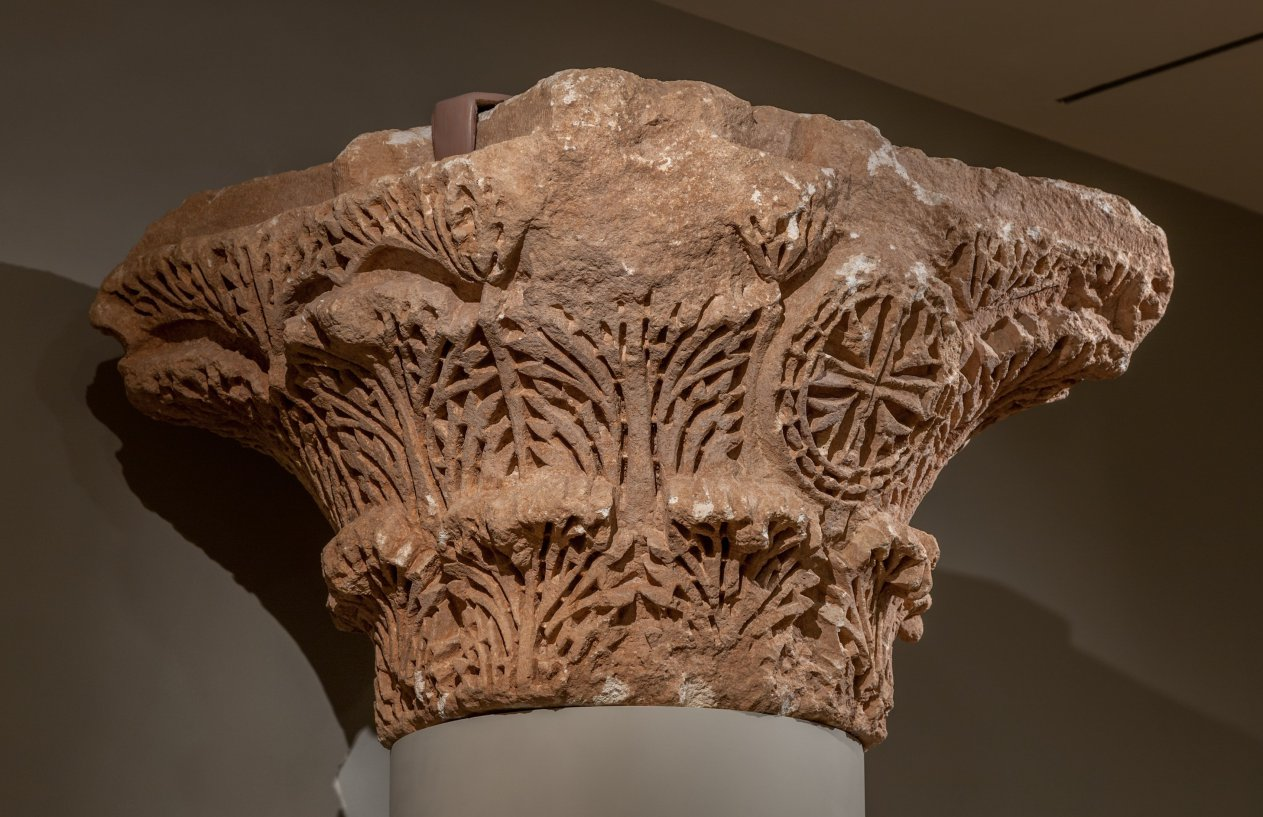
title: Capital with Acanthus and Crosses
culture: Byzantium, Northern Syria, Byzantine period, 5th century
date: 400s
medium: limestone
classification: Sculpture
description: These capitals - the Capital with Acanthus and Crosses and the Engaged Capital with Windblown Acanthus - may have been found in Northern Syria and presumably come from a large and important church. Both capitals are decorated with leaves of acanthus, a fleshy plant with jagged leaves native to the Mediterranean area. One capital is symmetrical with crosses in its ornament, the other is asymmetrical and gives the impression of windblown leaves.